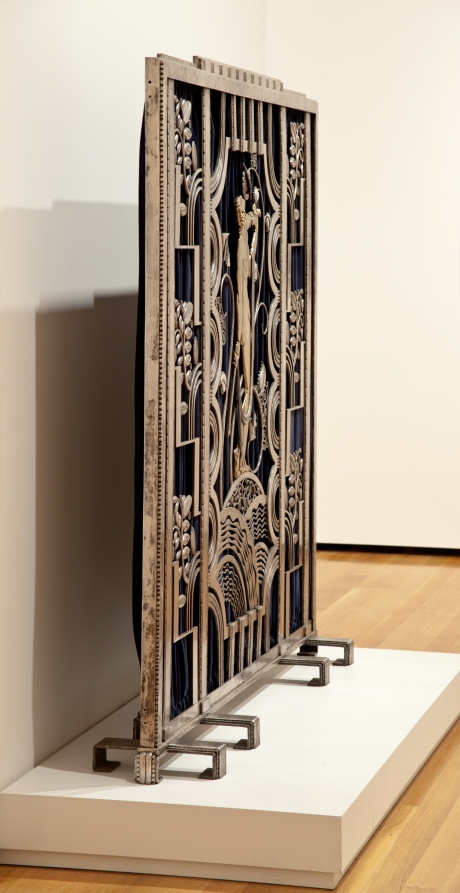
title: Muse with Violin Screen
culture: America, Ohio, Cleveland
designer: Paul Fehér (American, born Hungary, 1898–1990)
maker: Rose Iron Works (America, Ohio, Cleveland, est. 1904)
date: 1930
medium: Steel, brass; silver and gold plating, cotton velveteen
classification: Metalwork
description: Since the early years of the 20th century, the Rose Iron Works, a Cleveland supplier of architectural ornament, has produced distinguished metalwork. The company’s founder, Martin Rose, was born in Austria-Hungary and studied ornamental metalsmithing in Vienna prior to immigrating to Cleveland in 1902. In the 1920s, he hired a talented young Parisian designer, Paul Fehér, to work for the firm. Fehér’s designs, culminating in this massive screen, brought a modern European sensibility to the Rose Iron Works production. With its geometric patterning, highly stylized and abstracted natural forms, and the central figure reminiscent of the celebrated jazz singer Josephine Baker, this screen reflects the classic motifs of Art Deco design.